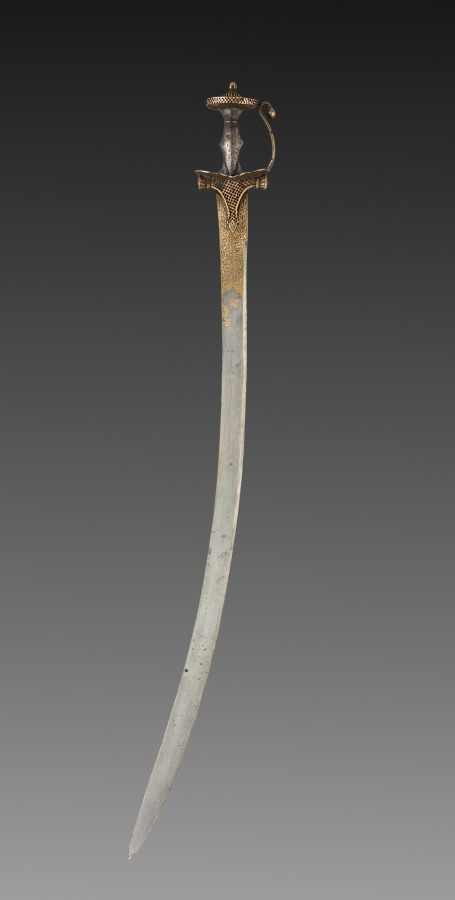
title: Tulwar Sword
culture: India, probably Deccan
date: 1700s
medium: Iron hilt with gold; steel blade with gold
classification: Arms and Armor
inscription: Help [comes] from God, and Victory is imminent.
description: This long curved sword and scabbard are of the kind used and worn by Mughal nobility, as seen often in paintings. The openwork hilt is a characteristic of swords from the southern Indian region known as the Deccan. By the end of the 1500s, the Mughals began making regular incursions into the Deccan as they attempted to expand their empire, increasing the exchange of art forms. Repeated four times, twice on one side of the blade and twice on the other in gold inlay, is the same line from the Qur'an 61:13: “Help [comes] from God, and Victory is imminent.” This is a popular inscription on daggers, banners, and other instruments of war, as it reassures the combatants that God is on their side, and therefore they can in good faith expect a speedy victory if they fight valiantly.